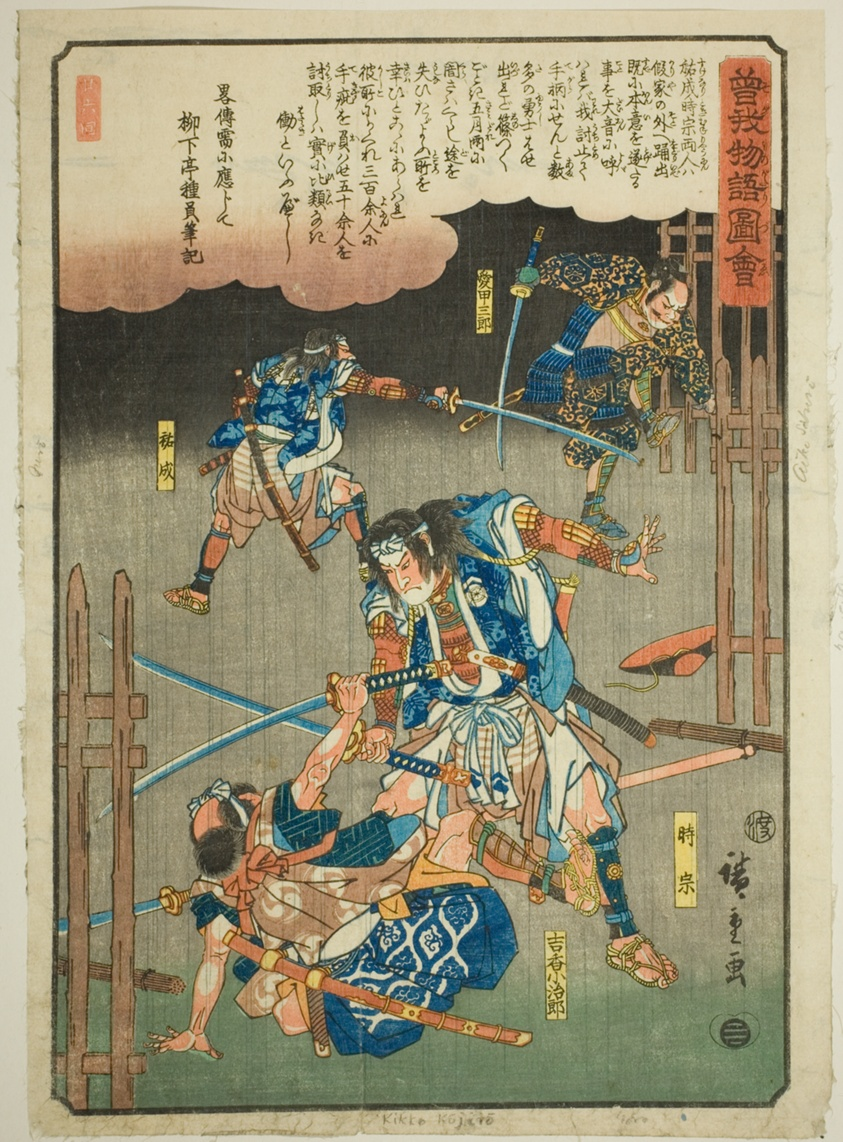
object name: Print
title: Tokimune, Sukenari, Kikko Kojiro and Aiko Saburo fighting in the rain, from the series "Illustrated Tale of the Soga Brothers (Soga monogatari zue)"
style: Japanese (culture or style)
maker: Utagawa Hiroshige 歌川 広重; Japanese, 1797-1858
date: c. 1843/47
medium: Color woodblock print; oban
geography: Japan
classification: woodblock print; print; asian art